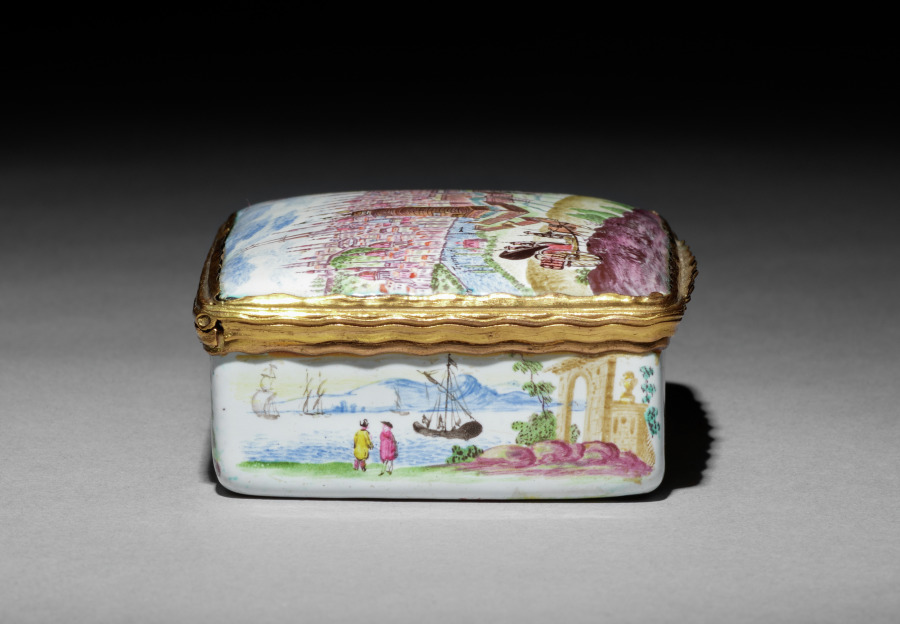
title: Snuff Box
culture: Austria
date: c. 1750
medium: enamel on copper with metal mounts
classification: Miscellaneous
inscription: on top there are a number of inscriptions in black: "Roma," "Trevere R," "C:ST: Ang" (for Castello San Angelo), "S: Pe:" (for San Pietro), "S.G.L." (probably for San Giovanni Laterano). on interior of lid: "WIENNE."